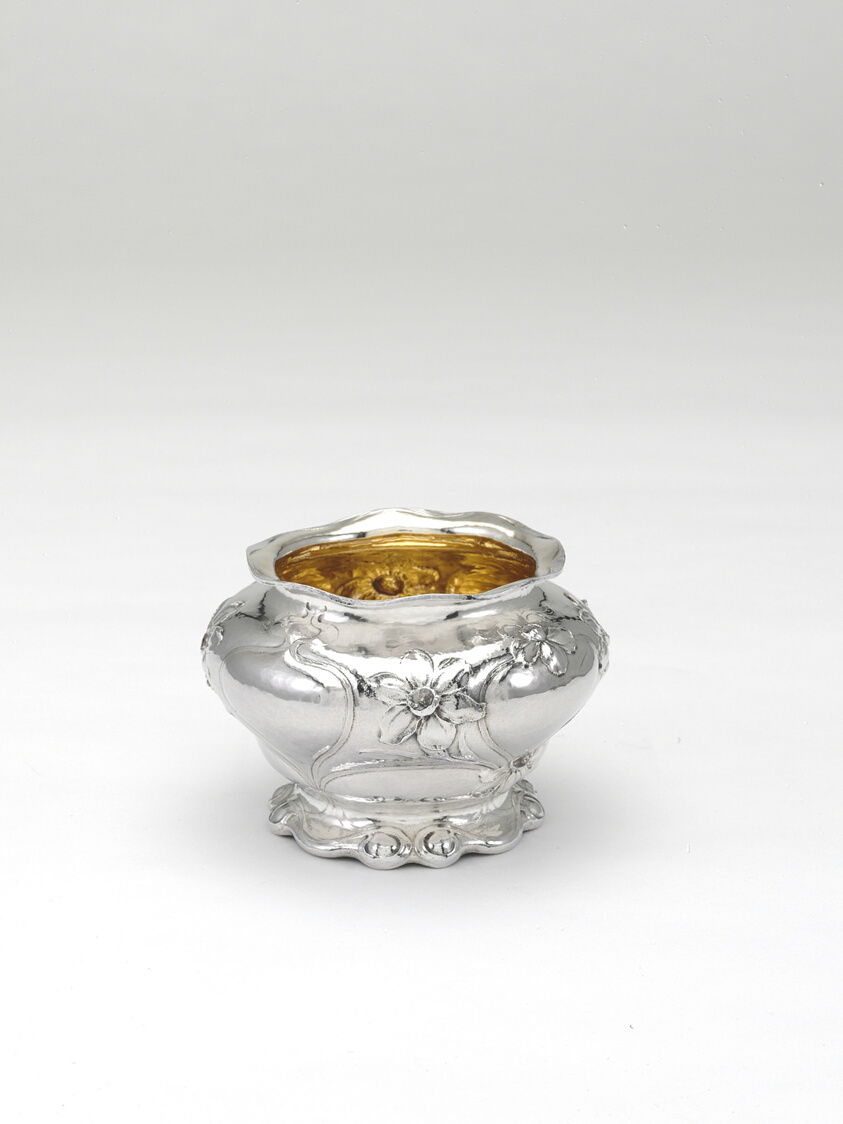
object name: Metalwork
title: Waste Bowl (part of a set)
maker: Gorham Manufacturing Company (American, founded 1831); Providence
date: 1900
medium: Silver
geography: Providence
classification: slop bowl; silver; american decorative arts; american arts; decorative arts